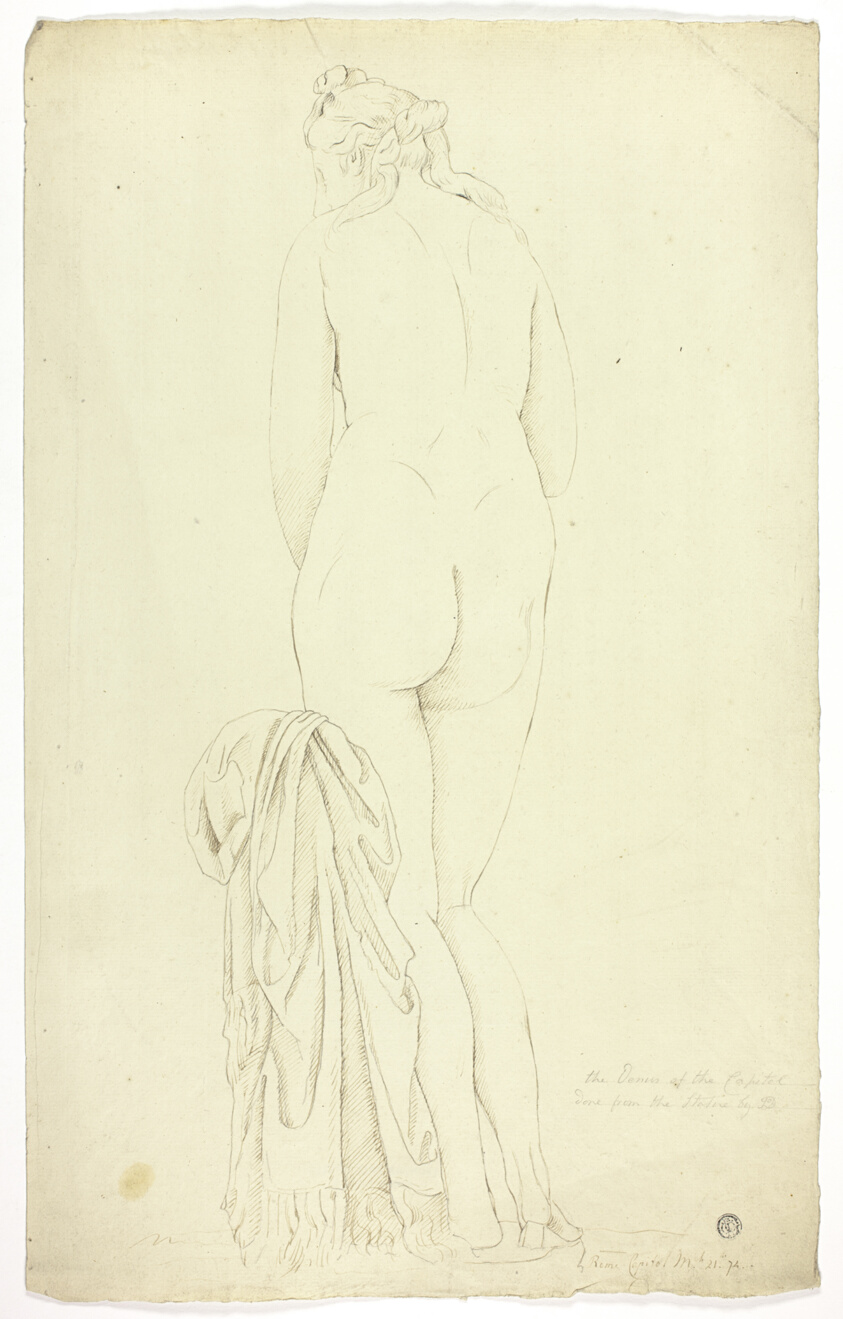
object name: Drawing and Watercolor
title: Capitoline Venus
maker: John Downman (English, 1750-1824)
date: 1774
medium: Pen and brown ink, over graphite, on ivory laid paper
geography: England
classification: pen and ink drawings; drawings (visual works); prints and drawing; paper